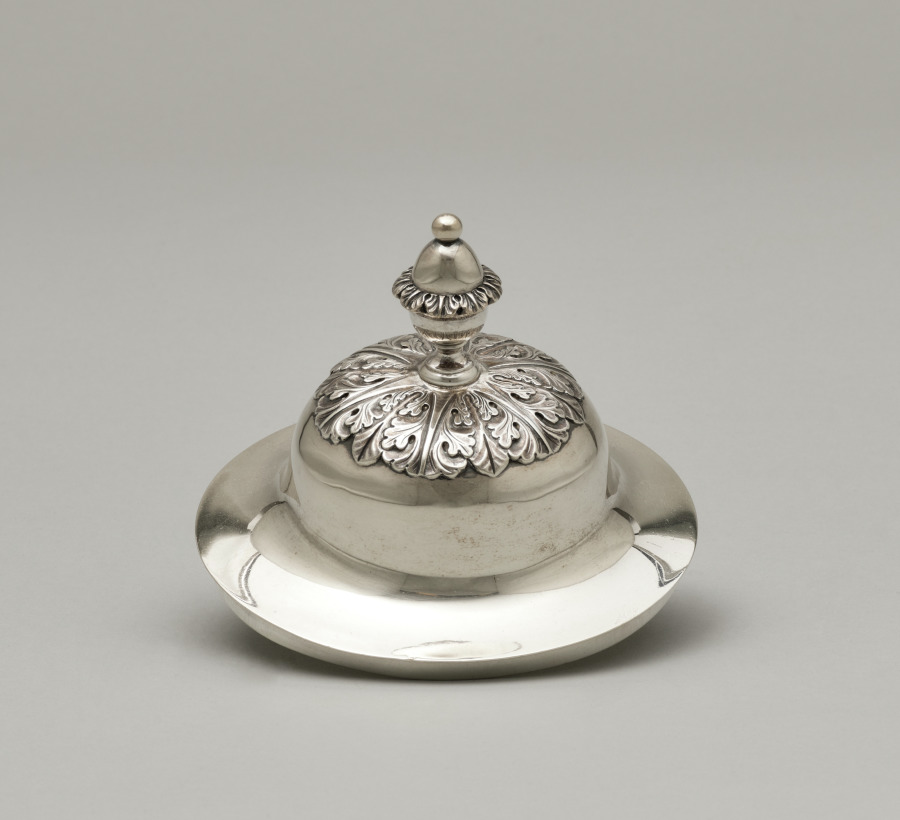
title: Tea Urn with Cover (lid)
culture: America, Pennsylvania, Philadelphia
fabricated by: Harvey Lewis (American, 1835)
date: 1811–25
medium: silver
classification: Silver